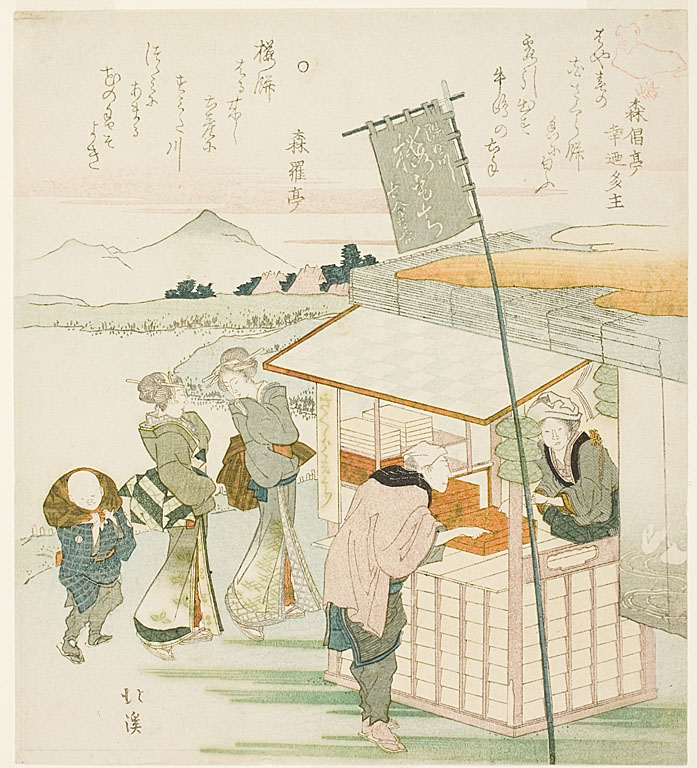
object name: Print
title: Women and Men by the Bento Shop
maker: Totoya Hokkei (Japanese, 1780-1850)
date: early 19th century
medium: Color woodblock print; surimono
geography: Japan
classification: woodblock print; print; asian art